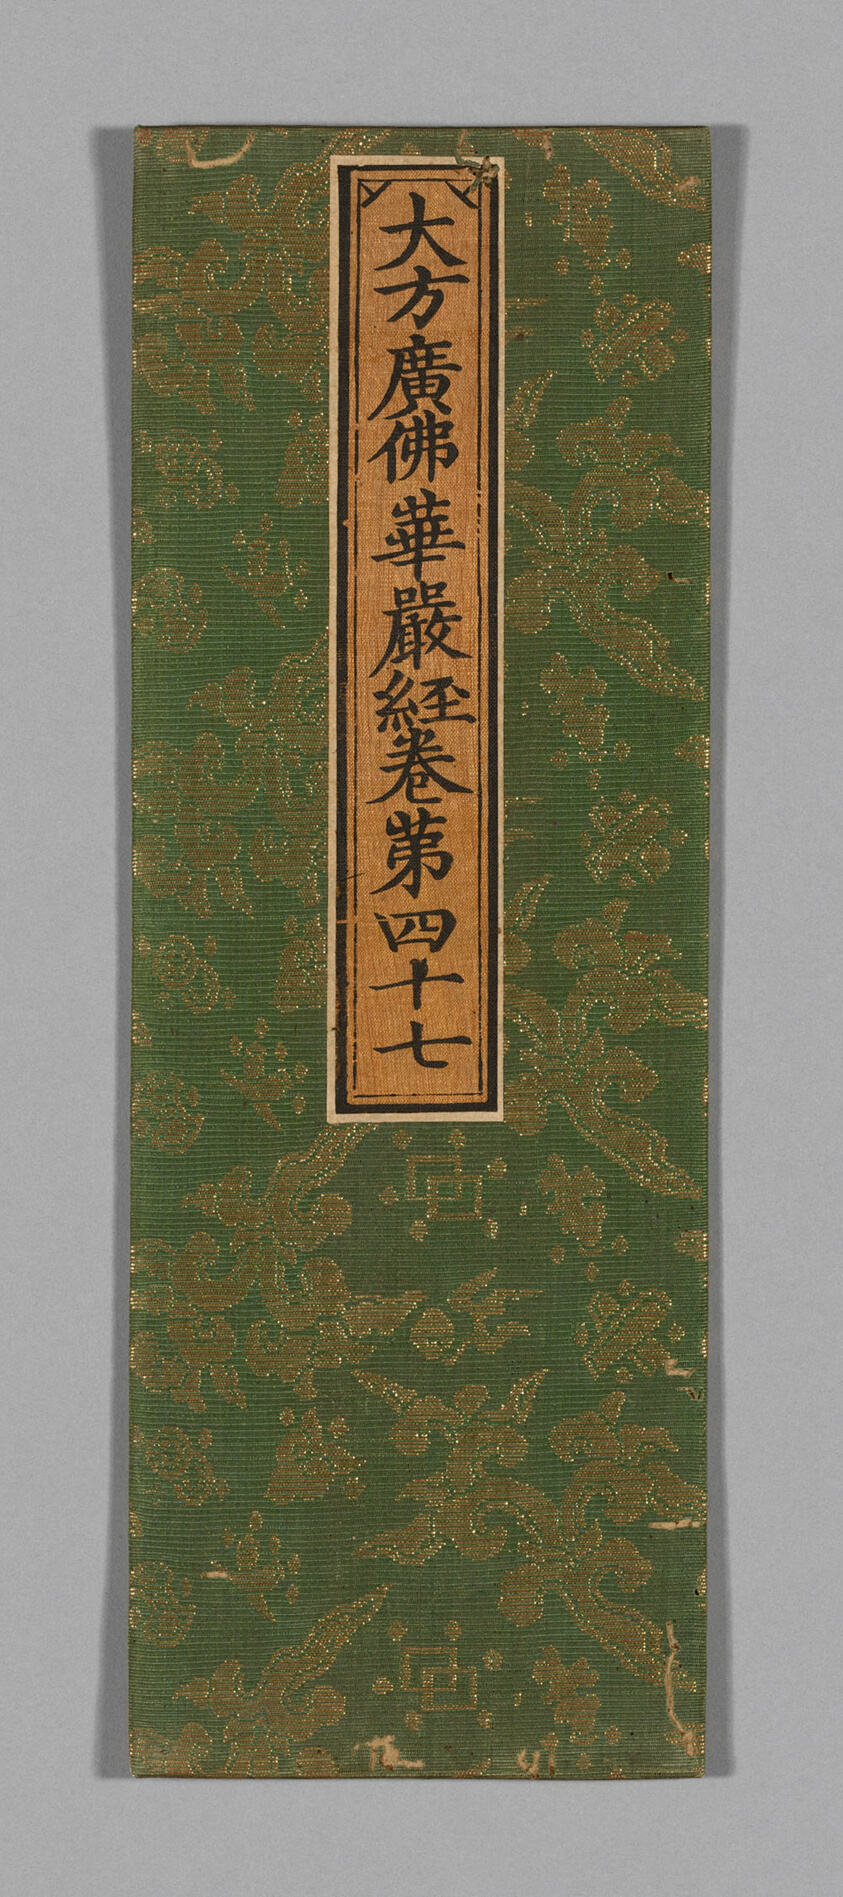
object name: Textile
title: Sutra Cover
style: ming, Chinese (culture or style), East Asian, asian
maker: China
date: Ming dynasty (1368–1644), c. 1590's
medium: Silk and gold-leaf-over-lacquered-paper strips, gauze weave with supplementary patterning wefts; label: silk, plain weave; painted with ink; glued over paper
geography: China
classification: textile; weaving